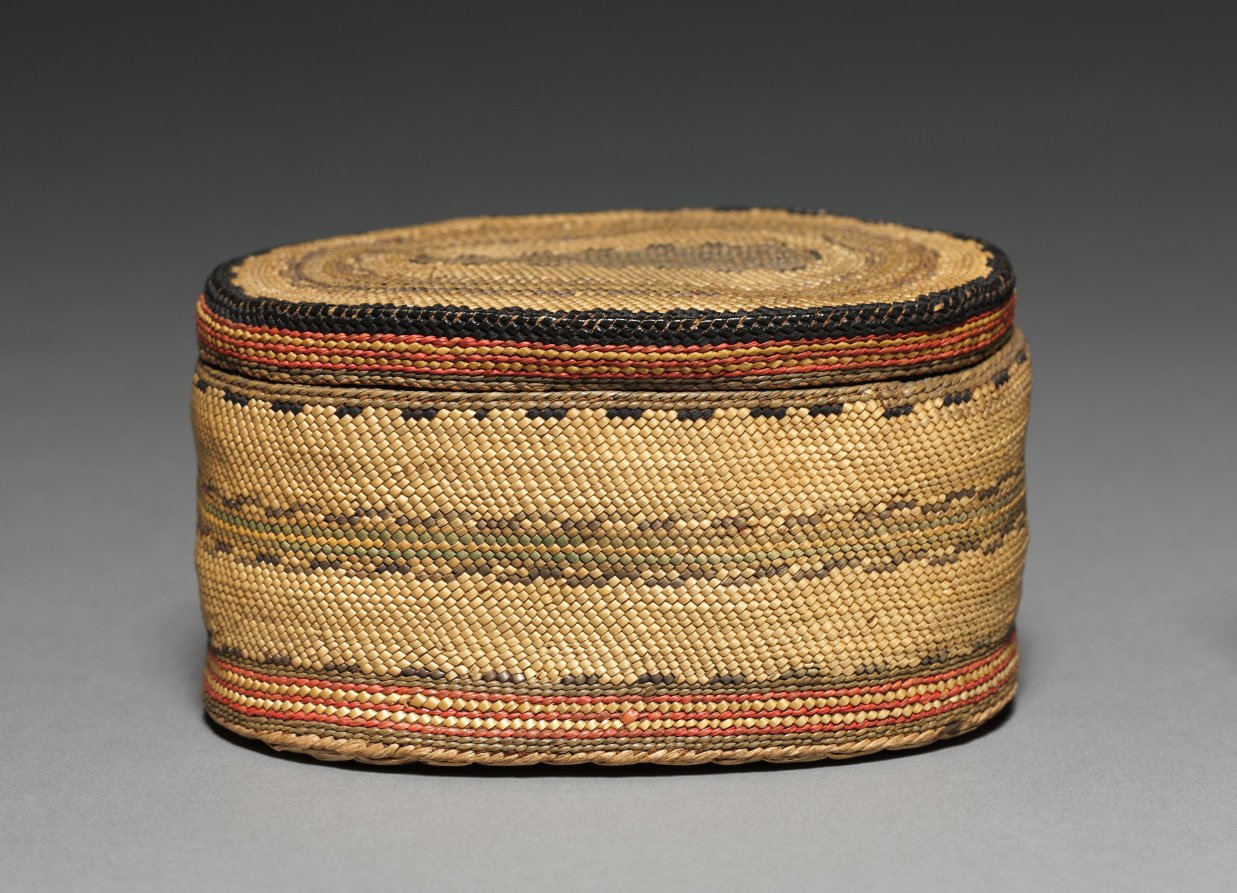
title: Lidded Bowl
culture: Northwest Coast, Vancouver Island, early 20th century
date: c 1900– 1925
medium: twined grass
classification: Basketry